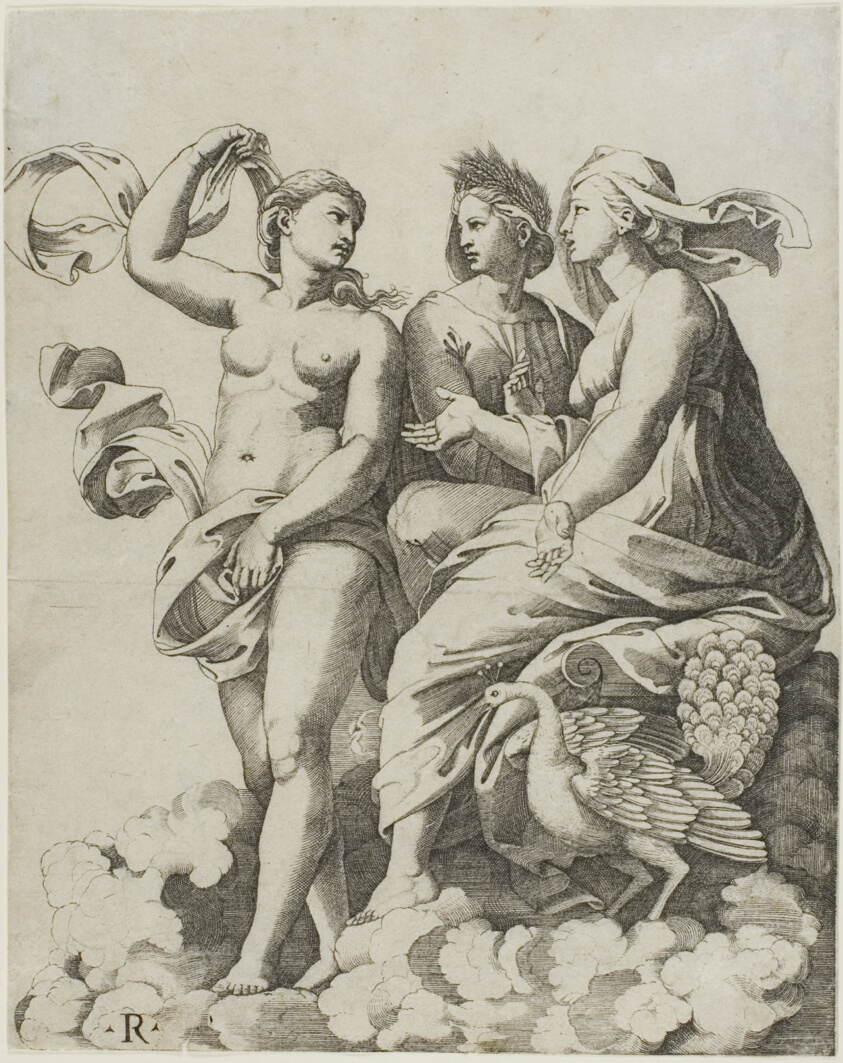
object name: Print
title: Juno, Ceres, and Psyche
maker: Marco Dente da Ravenna (Italian, about 1486–1527); after Raffaello Sanzio, called Raphael (Italian, 1483-1520)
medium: Engraving on paper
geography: Italy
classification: print; prints and drawing